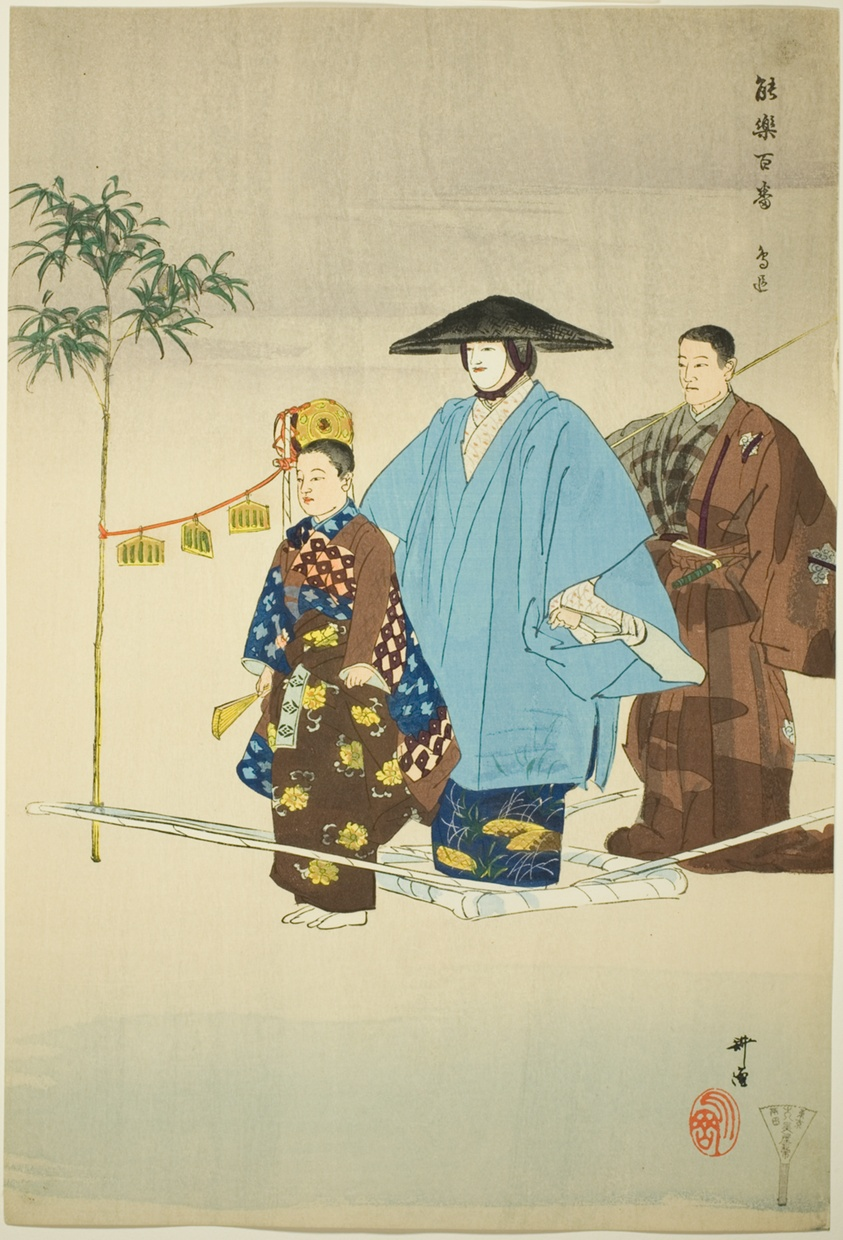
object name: Print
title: Tori-oi-bune, from the series "One Hundred No Dramas (Nogaku hyakuban)"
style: Japanese (culture or style)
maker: Tsukioka Kogyo; Japanese, 1869-1927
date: 1898/1903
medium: Color woodblock print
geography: Japan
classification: woodblock print; print; asian art